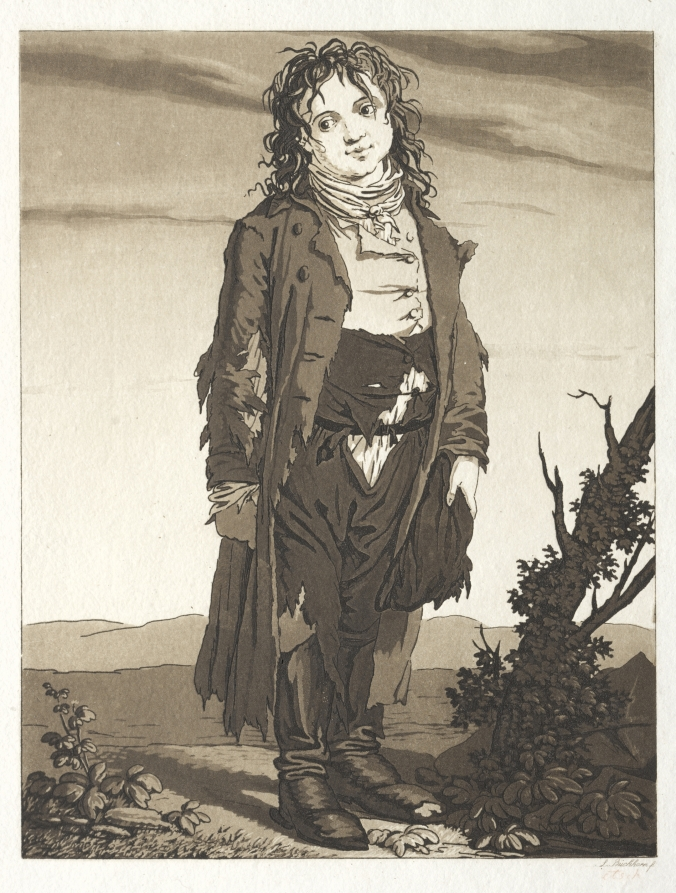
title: The Young Beggars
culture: Germany, late 18th-early 19th century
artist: Karl Ludwig Bernhard Buchhorn (German, 1770–1856)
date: c. 1800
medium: aquatint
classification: Print